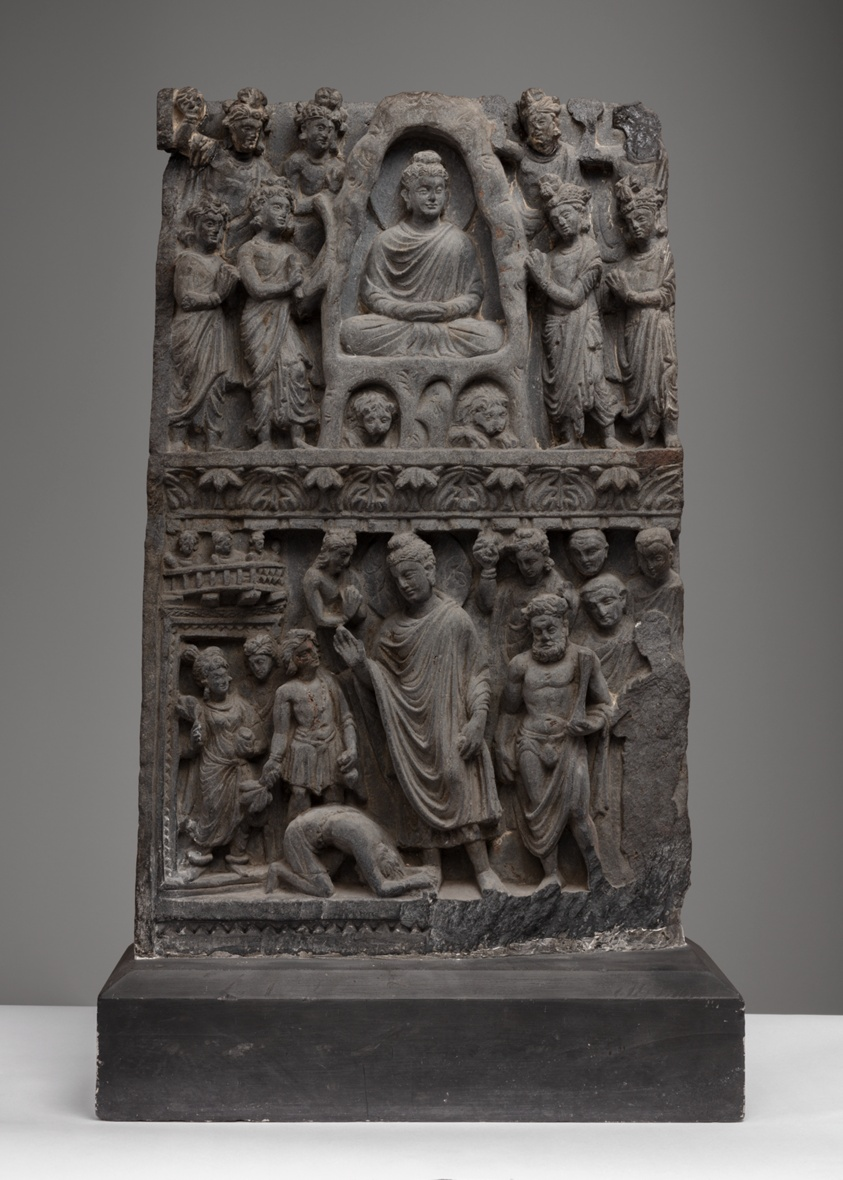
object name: Sculpture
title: Buddha Shakyamuni Meditating in the Indrashala Cave [top] and Buddha Dipankara [bottom]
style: South Asian, gandharan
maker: Pakistan; Ancient region of Gandhara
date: 2nd/3rd century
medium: Schist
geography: Gandhara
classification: sculpture; schist; stone; asian art